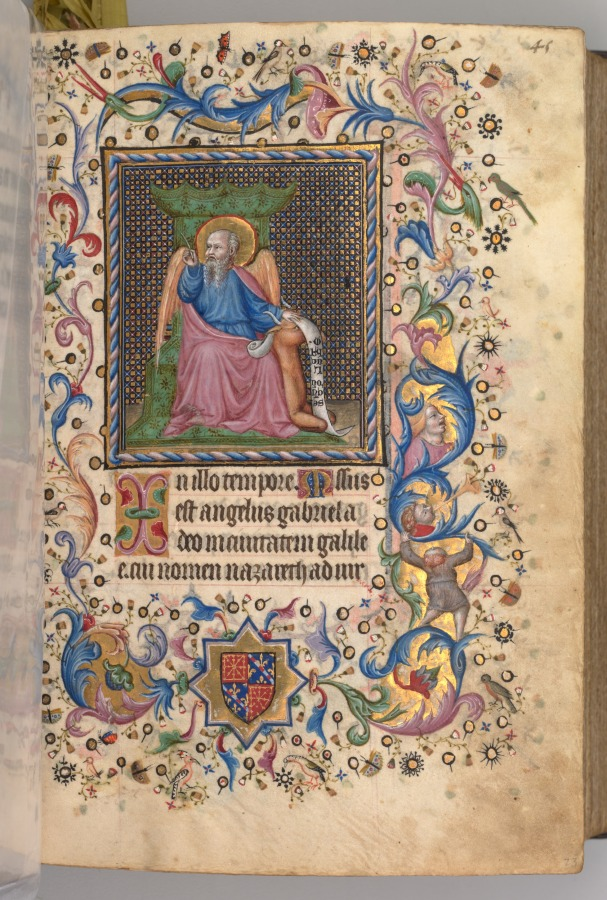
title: Hours of Charles the Noble, King of Navarre (1361-1425): fol. 23r, St. Luke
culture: France, Paris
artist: Master of the Brussels Initials and Associates (French)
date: c. 1405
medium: ink, tempera, and gold on vellum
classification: Bound Volume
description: This precious volume was obviously highly prized by its owner, the French-born King of Navarre, who had his coat of arms painted on no less than twenty folios. Rather than directly commissioning this manuscript from a specific workshop, it seems that Charles the Noble acquired his book of hours -- perhaps ready-made for the luxury market -- while on a trip to Paris in 1404-05. A collaborative effort, six painting styles are evidenced within the pages of this codex, those of two Italians, two Frenchmen, and two Netherlanders. The painter who was responsible for the planning and decoration of the book, and who produced seventeen of the large miniatures, was a Bolognese artist known as the Master of the Brussels Initials. His principal assistant, responsible for most of the borders, was a Florentine who signed his name "Zecho" da Firenze on folio 208 verso.